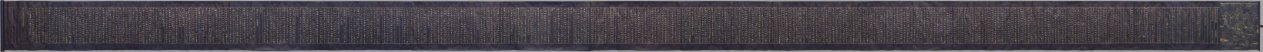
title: Meta-Discourse on the Teachings from the Treasury (Abidharmakosha-Bhashya)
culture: Japan, Heian period (794–1185)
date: 1100s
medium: handscroll; gold and silver on indigo-dyed paper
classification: Manuscript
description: This religious text relates some of the teachings of the great fourth-century Indian Buddhist scholar Vasubhandhu. The text analyzes human consciousness in its relationship to the environment and transformations that occur during meditation. This scroll is the 17th part of a 30-part translation of the text by Xuanzang, an eminent seventh-century Chinese monk.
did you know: The frontispiece depicts the Buddha Shakyamuni preaching in a paradisical landscape.